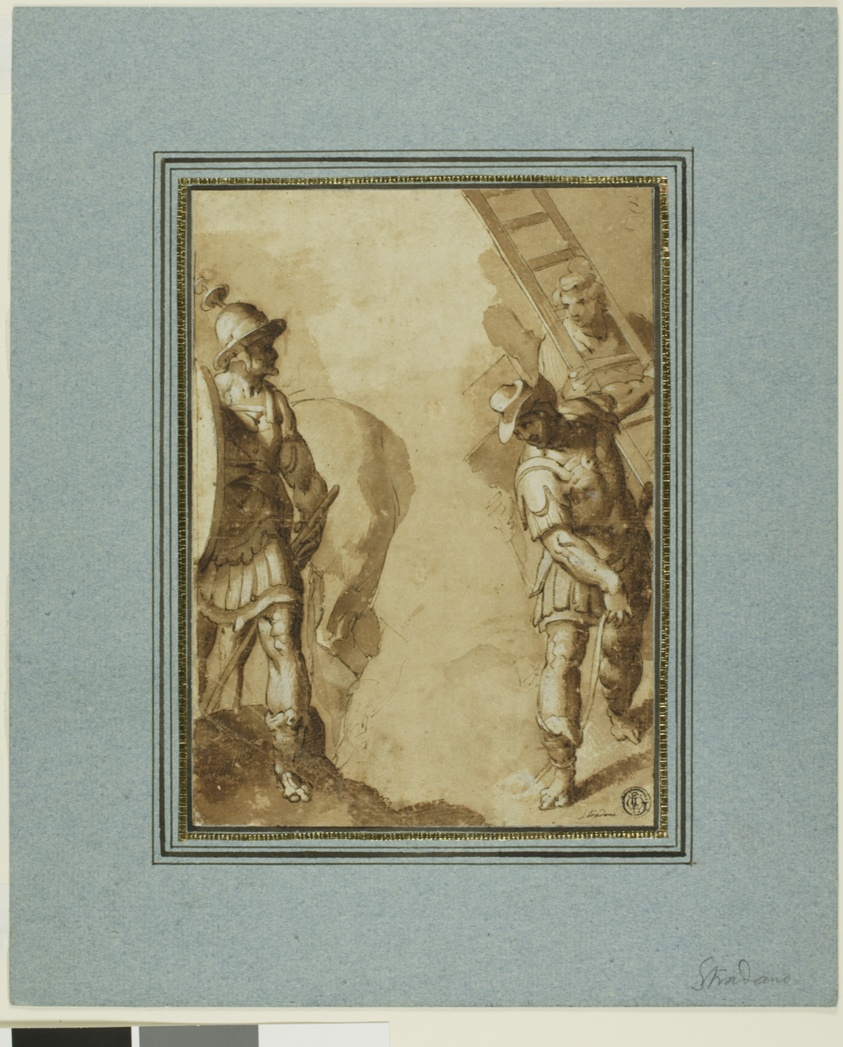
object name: Drawing and Watercolor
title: Way to Calvary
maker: Follower of Joannes Stradanus, called Giovanni Stradano; Flemish, 1523-1605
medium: Pen and brown ink with brush and brown wash, heightened with white gouache, on cream laid paper, laid down on blue card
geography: Flanders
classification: ink or chalk wash; drawings (visual works); prints and drawing